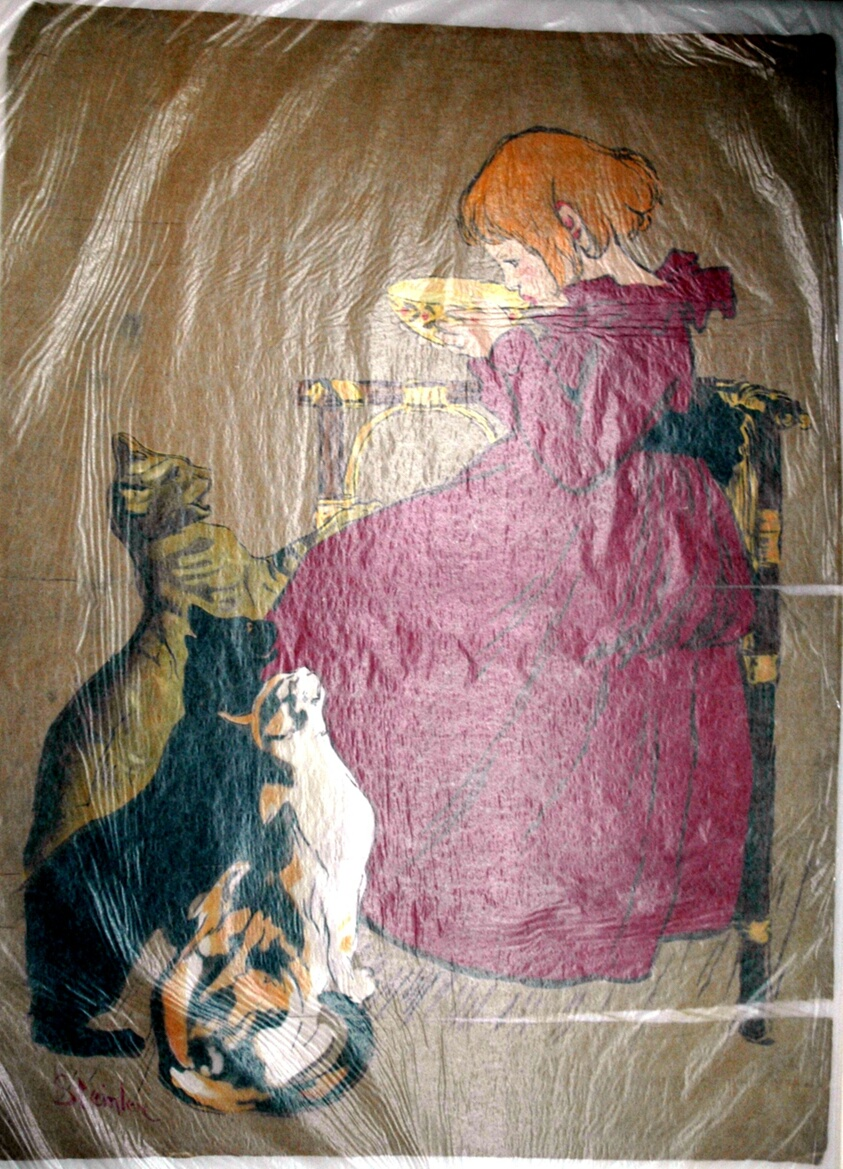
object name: Print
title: Pure Sterilized Milk from the Vingeanne Region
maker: Théophile-Alexandre Steinlen; French, born Switzerland, 1859-1923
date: 1894–96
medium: Color lithograph on tan wove paper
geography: France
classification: lithograph; print; prints and drawing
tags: cats, animals